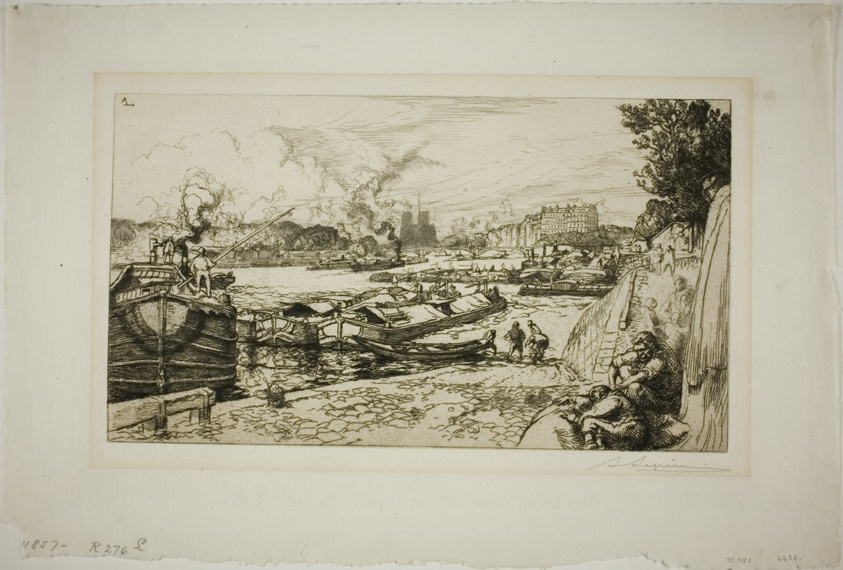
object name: Print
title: The Seine at the Mouth of the Canal Saint-Martin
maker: Louis Auguste Lepère (French, 1849-1918)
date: 1904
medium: Etching on cream laid paper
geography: France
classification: etching; print; prints and drawing